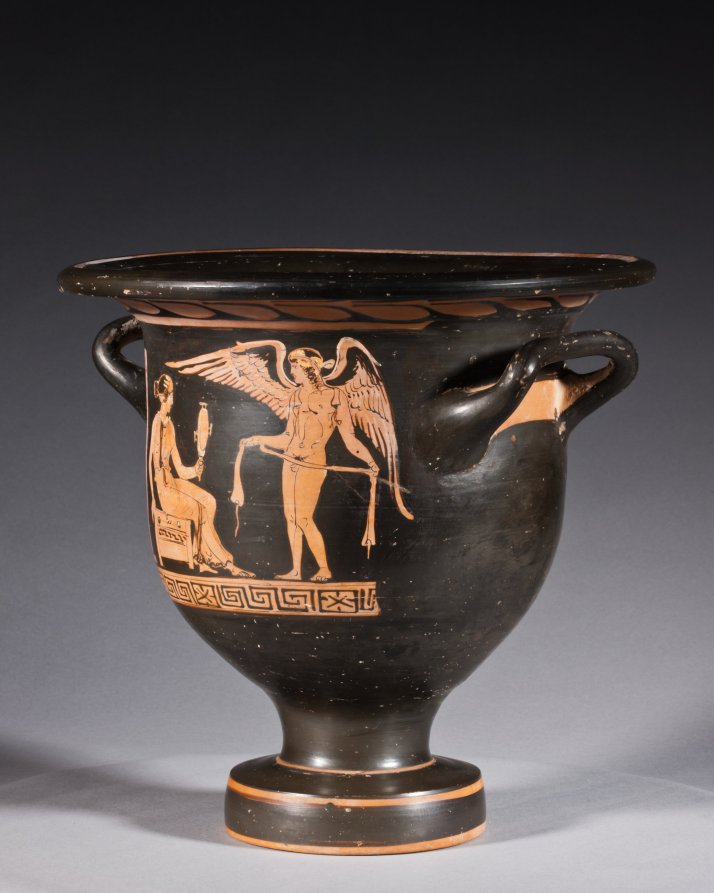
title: Red-Figure Bell Krater (Mixing Vessel): Aphrodite and Eros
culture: South Italian, Apulian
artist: attributed to Graz Painter (South Italian, Apulian, active c. 380–360 BCE)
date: c. 370–360 BCE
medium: ceramic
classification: Ceramic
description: This small mixing vessel shows a finely dressed woman seated on a chest and holding up a mirror to admire herself. Before her stands Eros, the winged god of love, holding a ribbon or sash. Behind the woman stands a pillar with the inscription ΑΦΡΟΔΙΤΗ, or APHRODITE, the goddess of love. Such labels are rare on vases, and scholars debate whether this names the woman shown as Aphrodite herself, with her son Eros, or a bride envisioning herself as Aphrodite, just before her wedding.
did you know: The dancing nude youths on the reverse are unusual; typically they would be standing and draped.